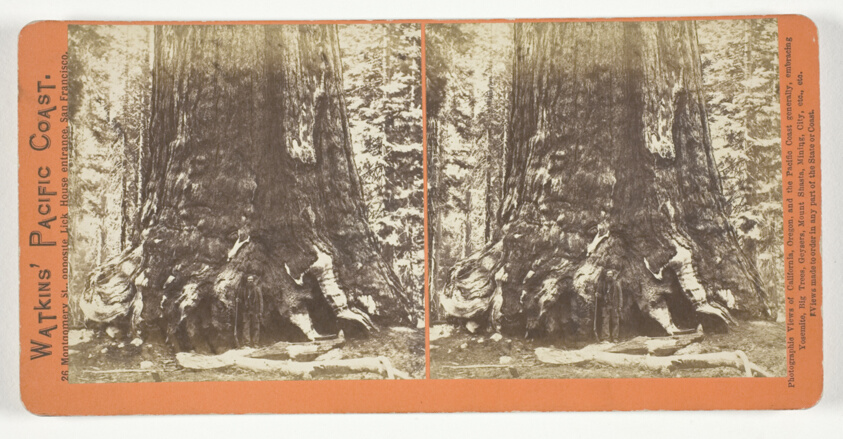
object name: Photograph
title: Section of the Grizzly Giant (tree), 33 ft. Diam., Mariposa Grove, Yosemite, from the series "Watkins' Pacific Coast"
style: 19th century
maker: Carleton E. Watkins; American, 1829-1916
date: 1861/76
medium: Albumen print, stereo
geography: United States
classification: stereograph (albumen); albumen silver print; photographic process; photography; photograph